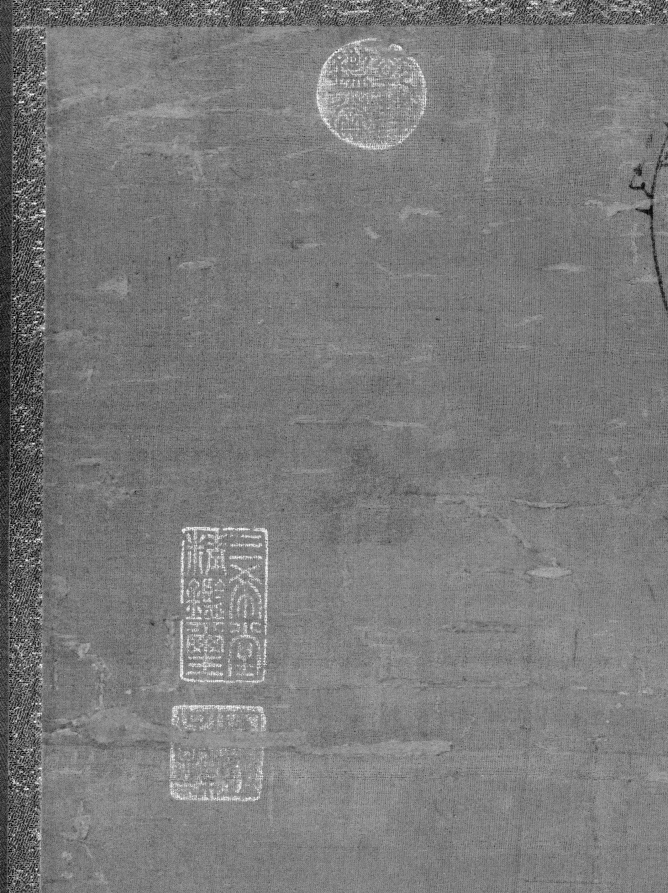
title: A Prunus in the Moonlight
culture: China, Yuan dynasty (1271-1368)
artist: Wang Mian (Chinese, 1287–1359)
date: 1300s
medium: Hanging scroll; ink on silk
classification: Painting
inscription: 8 additional seals: 6 of the Qianlong 乾隆 emperor (r. 1736-95); 2 of Dong Gao 董誥 (1740-1818).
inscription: 海雲初破月團團，獨鶴高飛夜未殘。/ 一片笙簫湖水上，玉妃含笑倚闌干。 王元章作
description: The plum flourishes in the mild climate of the south, and it was not before the Six Dynasties period (220– 589 CE) that the motif began to be appreciated by southern artists, many of whom had emigrated from the north. Wang Mian from Zhejiang province had failed the civil and military service examinations and later rejected appointments under the Mongol government. Instead, he chose to return home, making a living by selling plum paintings. Few of Wang’s works have survived, but they demonstrate that by his time the ink-plum (momei) genre was fully developed.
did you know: The painting portrays the plum in the nighttime, as indicated by the tint of the background and the presence of the moon.